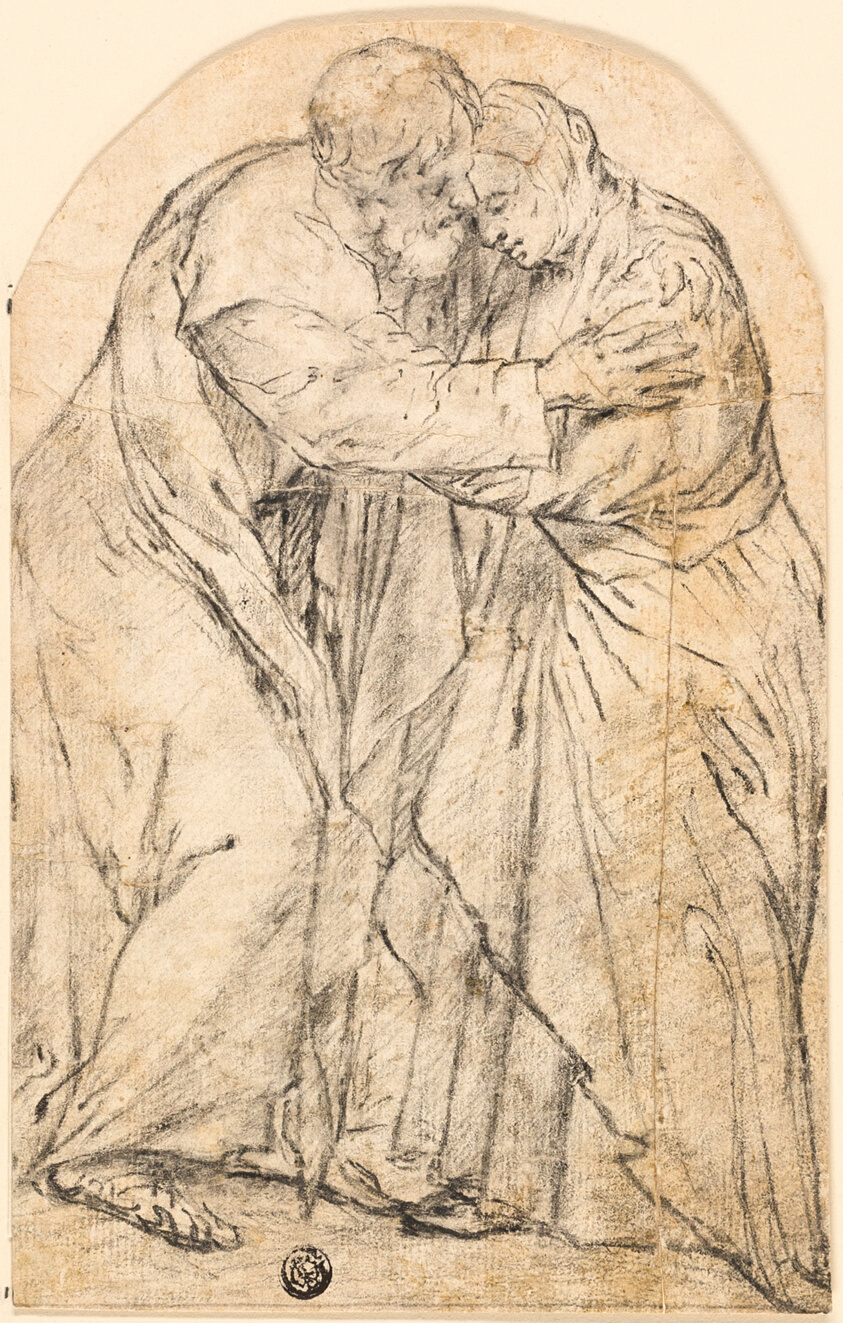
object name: Drawing and Watercolor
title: Joachim and Anna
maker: Attribute to Juan Ribalta (Spanish, 1596-1628); or in the style of Vicencio Carducho (Italian, 1570-1638)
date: 1609-1699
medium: Black chalk on ivory laid paper laid down on cream wove paper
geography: Spain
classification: chalk; drawings (visual works); prints and drawing